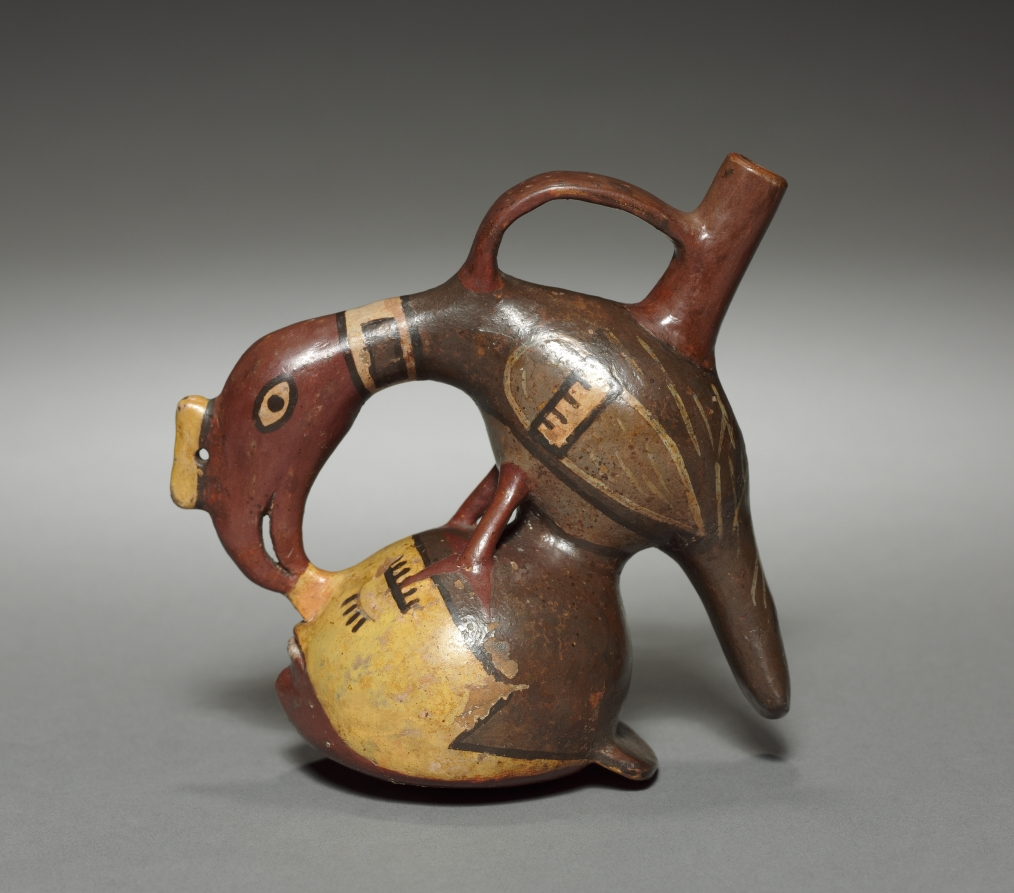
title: Vessel with Condor and Human Head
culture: Peru, Tiwanaku style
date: 400–1000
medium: pottery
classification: Ceramic